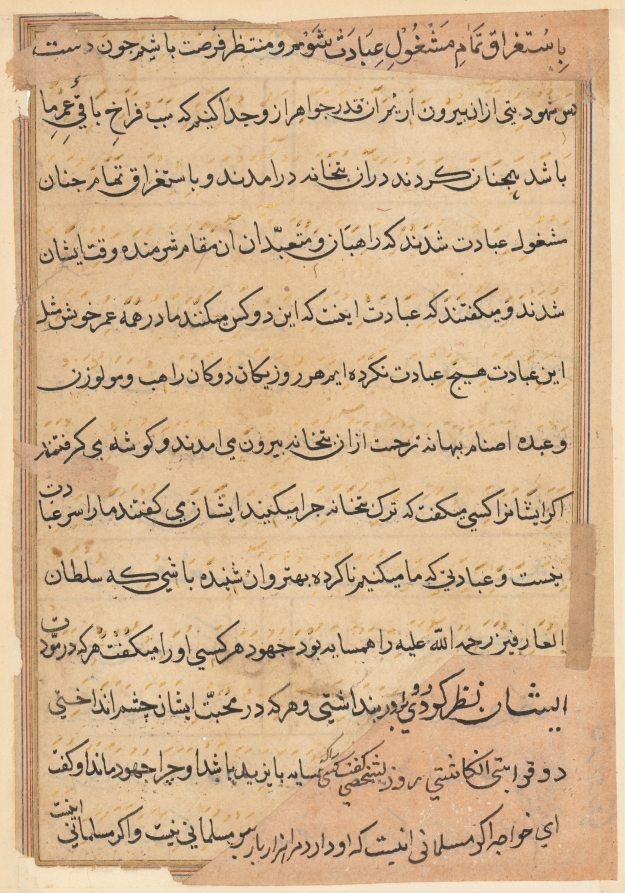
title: Page from Tales of a Parrot (Tuti-nama): text page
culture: Mughal India, court of Akbar (reigned 1556–1605)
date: c. 1560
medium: gum tempera, ink, and gold on paper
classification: Painting